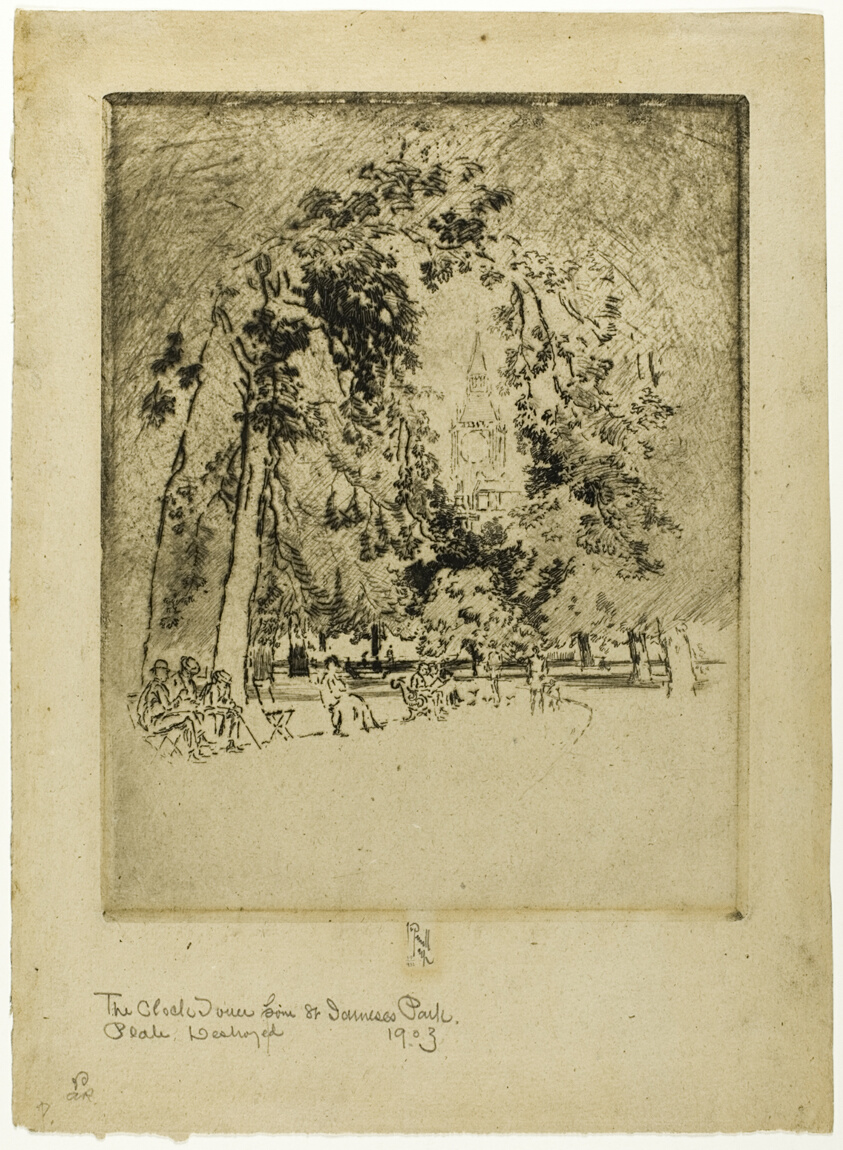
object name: Print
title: The Clock Tower, From St. James Park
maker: Joseph Pennell (American, 1857-1926)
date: 1904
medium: Etching and drypoint on buff wove paper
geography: United States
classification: etching; print; prints and drawing